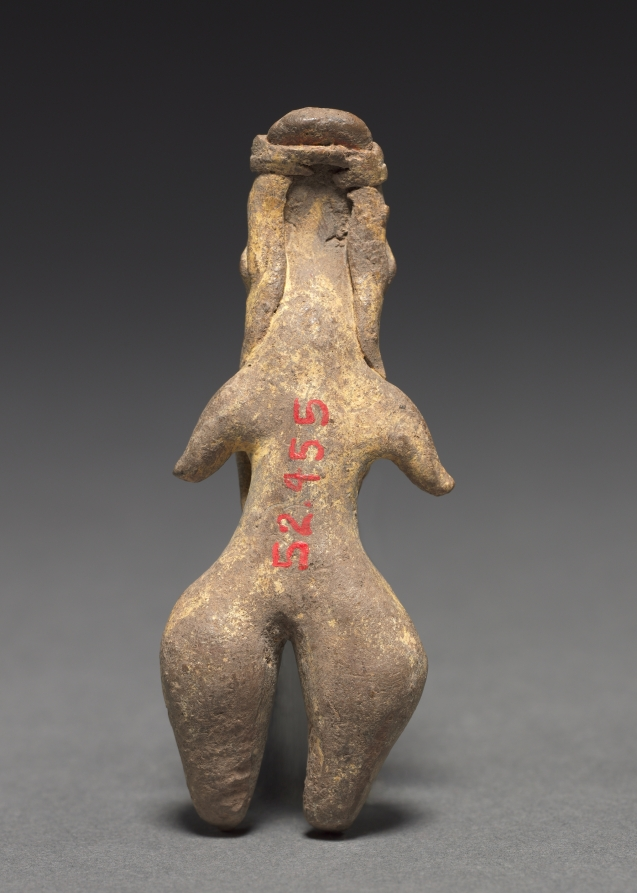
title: Standing Female Figurine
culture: Mesoamerica, Central Mexico, Tlatilco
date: 1200–400 BCE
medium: Ceramic, pigment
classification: Ceramic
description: This figurine represents the best-known type found in graves at Tlatilco, an early farming village on the outskirts of Mexico City. The type is known as the “pretty lady” after its representatives’ sweet faces, fancy hairstyles, pinched waists, and flaring hips and thighs.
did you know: This figurine represents the best-known type found in graves at Tlatilco, an early farming village.